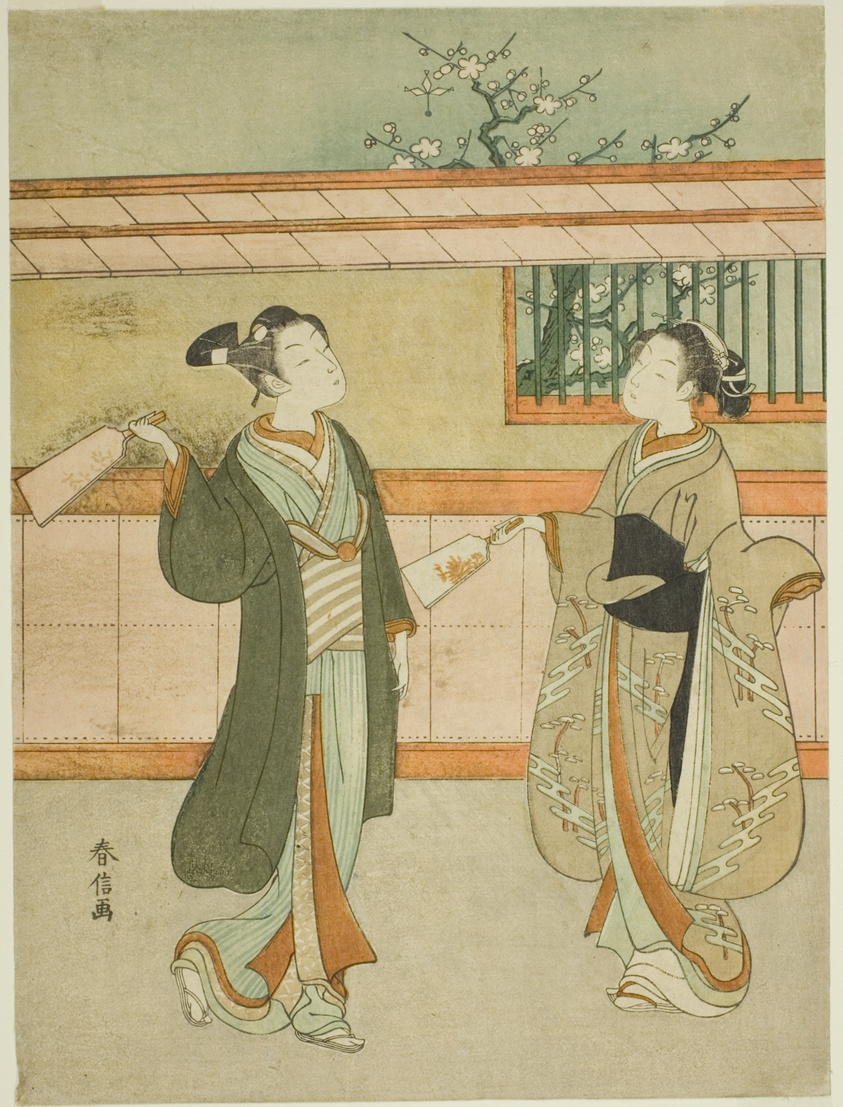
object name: Print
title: Playing Battledore and Shuttlecock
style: Japanese (culture or style)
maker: Suzuki Harunobu 鈴木 春信; Japanese, 1725 (?)-1770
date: c. 1765/70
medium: Color woodblock print; chuban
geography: Japan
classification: woodblock print; print; asian art